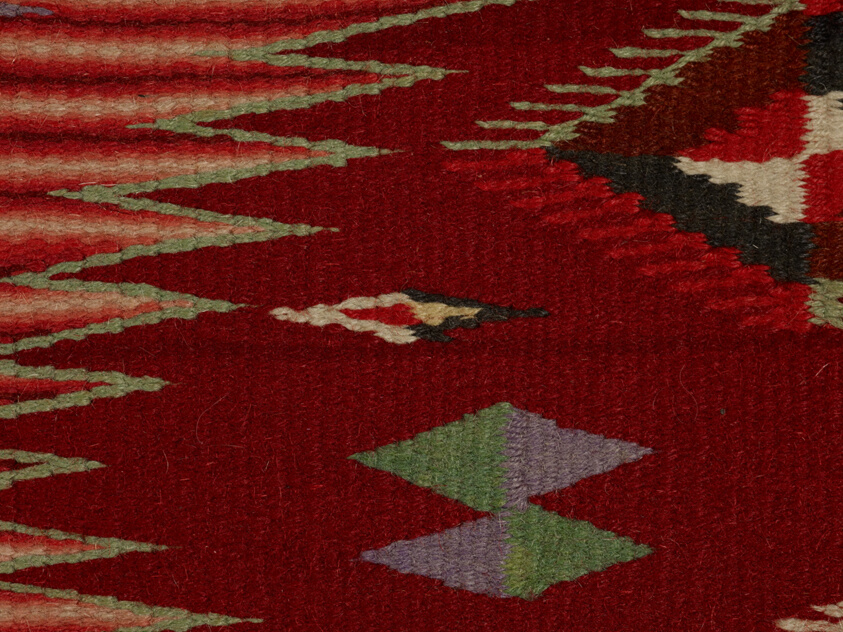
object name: Textile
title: "Eye-Dazzler" Weaving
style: navajo, native american, americas, Folk Art, 19th century, indigenous, north american, native north american, eye-dazzler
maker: Navajo (Diné) (Arizona, New Mexico, and Utah, United States)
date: 1880/1900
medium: Cotton and wool, single interlocking tapestry weave; twined selvages and heading, overcast finish terminating in tassels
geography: Navajo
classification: textile; weaving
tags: geometric, zigzags